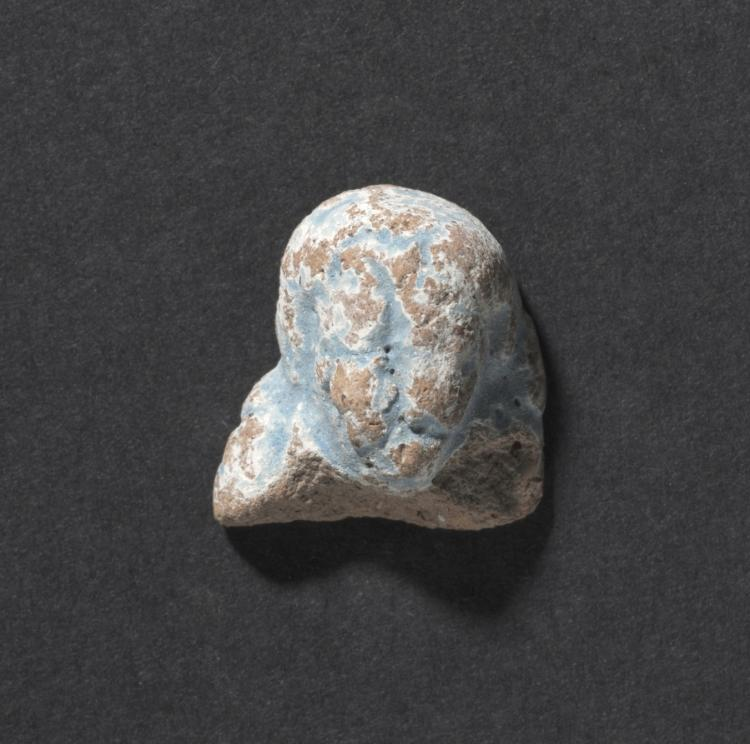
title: Shawabty of Ditamenpaankh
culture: Egypt, Late period (715–332 BCE), Dynasty 25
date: 715–656 BCE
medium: terracotta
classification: Funerary Equipment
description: High demand for shawabtys in the Late Period, a time when as many as 400 or more shawabtys were placed in the tomb with the deceased, gave rise to a specialized container for storing them: the shawabty box. This example is inscribed for the lady of the house, Ditamenpaankh, and was probably one of a pair originally made for her. The single-masted boat on the box's lid is perhaps an allusion to the pilgrimage of the deceased to the holy city of Abydos, the cult city of Osiris, king of the dead. The shawabtys inside are crude, mass-produced examples cast in an open mold. Made of terracotta, their blue paint imitates more costly shawabtys made of faience. As for the shawabty spell, it has been removed from its traditional location on the shawabty's front and relocated onto the sides of box, where it needed only to be written once, thus expediting production.